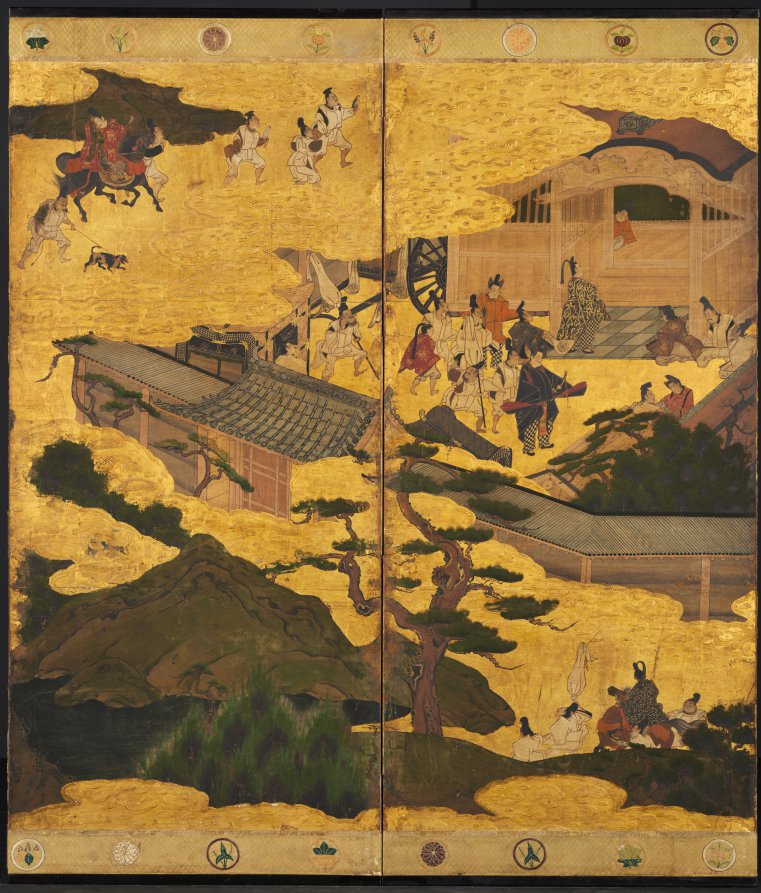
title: Scenes from the Tales of Ise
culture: Japan, Edo period (1615–1868)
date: mid-1600s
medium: One of a pair of six-panel folding screens; ink, color and gold on paper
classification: Painting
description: While the 11th-century Tale of Genji is universally regarded as Japan's literary masterpiece, the source for visual imagery in Japanese culture is rivaled by another literary classic, the Tales of Ise. A 10th-century anthology of poems interspersed with commentary, the Ise portrays the emotional and geographical journey of a courtier from the capital (Kyoto) into the countryside and beyond. The poems describe features of the natural, untamed terrain, linking them to the rather melancholy state of the traveler. Since the Tales of Ise was—and remains today—well read by educated Japanese, a person viewing these folding screens would immediately recognize its subject, organized as a series of discrete scenes read from right to left. Neither a signature nor a seal identifies the artist, but judging from related paintings, the work can be ascribed to an artist working in Kyoto during the first quarter of the 17th century in the manner of the painter Iwasa Matabei (1578–1650). This type of historical narrative composition became quite popular around 1600 among patrons favoring a distinctly Japanese style of painting which employed rich mineral pigments and a liberal use of gold.